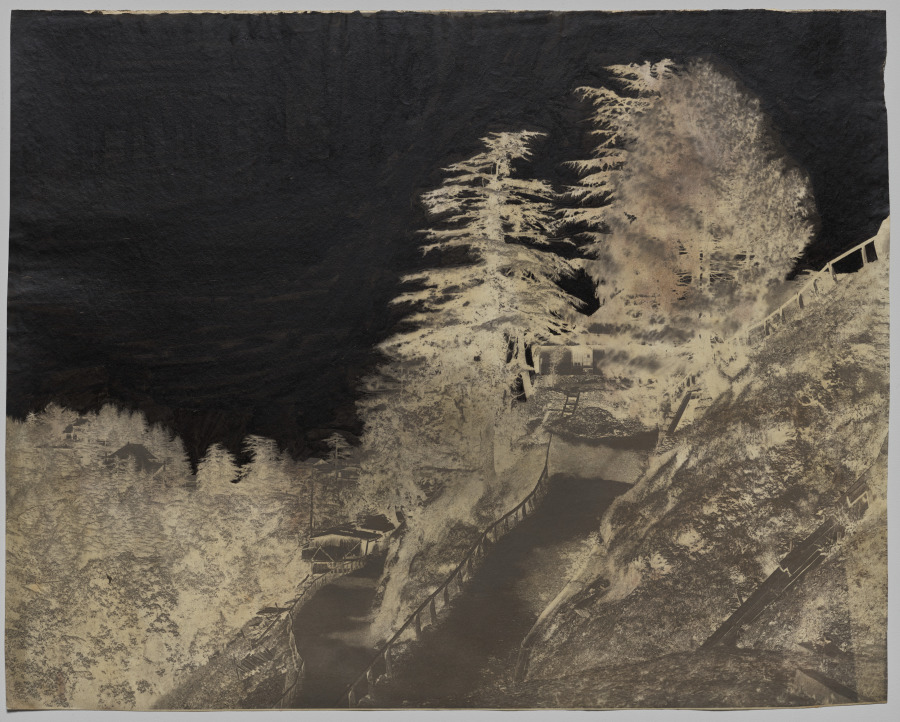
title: Shimla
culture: England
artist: Dr. John Murray (Scottish, 1809–1898)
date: 1865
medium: waxed paper negative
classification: Photograph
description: Before digital photography, most cameras yielded a negative, an image in which the tones are the reverse of those in the original subject. Early photographers shot on sheets of paper that were waxed to make them more translucent, then coated with a light-sensitive solution and exposed in the camera. To create a positive image, light was passed through the negative onto light-sensitive paper, which was developed in a series of chemical baths to create the print.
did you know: Simla, a town in the Himalayan foothills, became the summer capital of British colonial India in 1864.